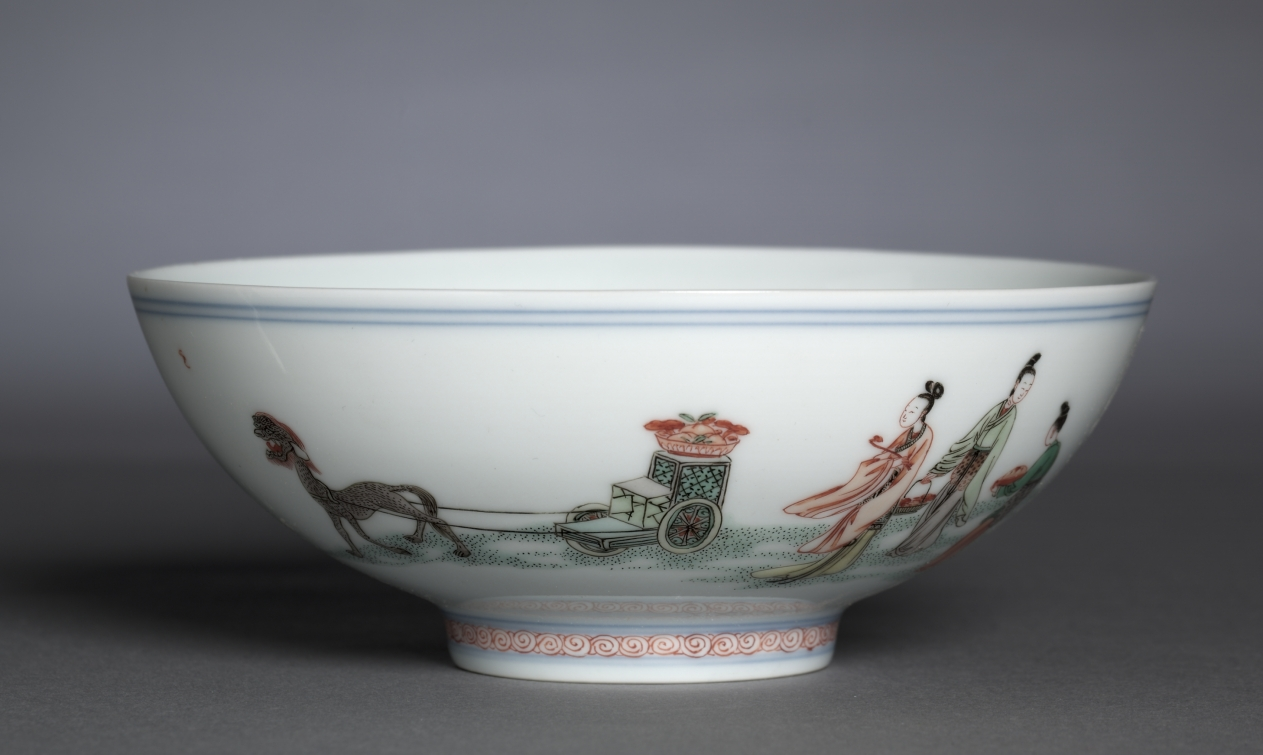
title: Bowl with Xiwangmu and Attendants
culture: China, Jiangxi province, Jingdezhen, Qing dynasty (1644-1911), Kangxi reign (1662-1722), but Chenghua mark (1465-87)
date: 1662–1722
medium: porcelain with famille verte overglaze enamel decoration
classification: Ceramic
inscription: 大明成化年製